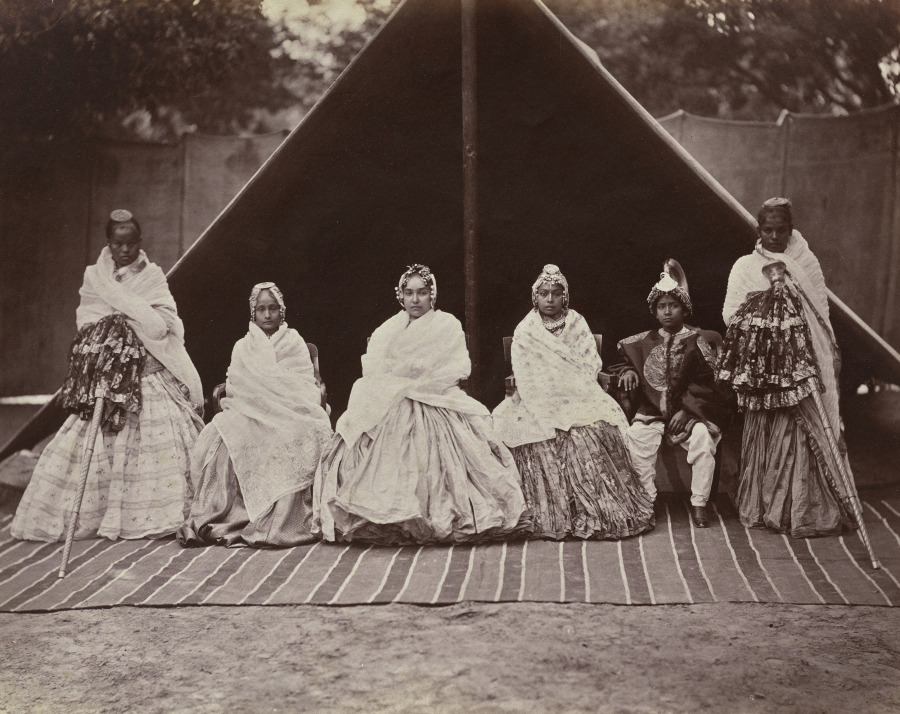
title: Three of Sri Tung Bahadur's Favorite Wives and His Youngest Son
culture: England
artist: Bourne & Shepherd (British, active India, 1868–2016)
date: c. 1870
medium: albumen print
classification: Photograph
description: Jung Bahadur Rana (1817-1877), prime minister and ruler of Nepal from 1846-1877, made the governmental systems of England and France the models for his modernization of his country’s governance. His admiration for Europe led to the women of his court incorporating aspects of European fashion into their dress, such as the voluminous skirts and shawls seen here.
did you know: This portrait shows three of the thirteen wives of the ruler of Nepal.